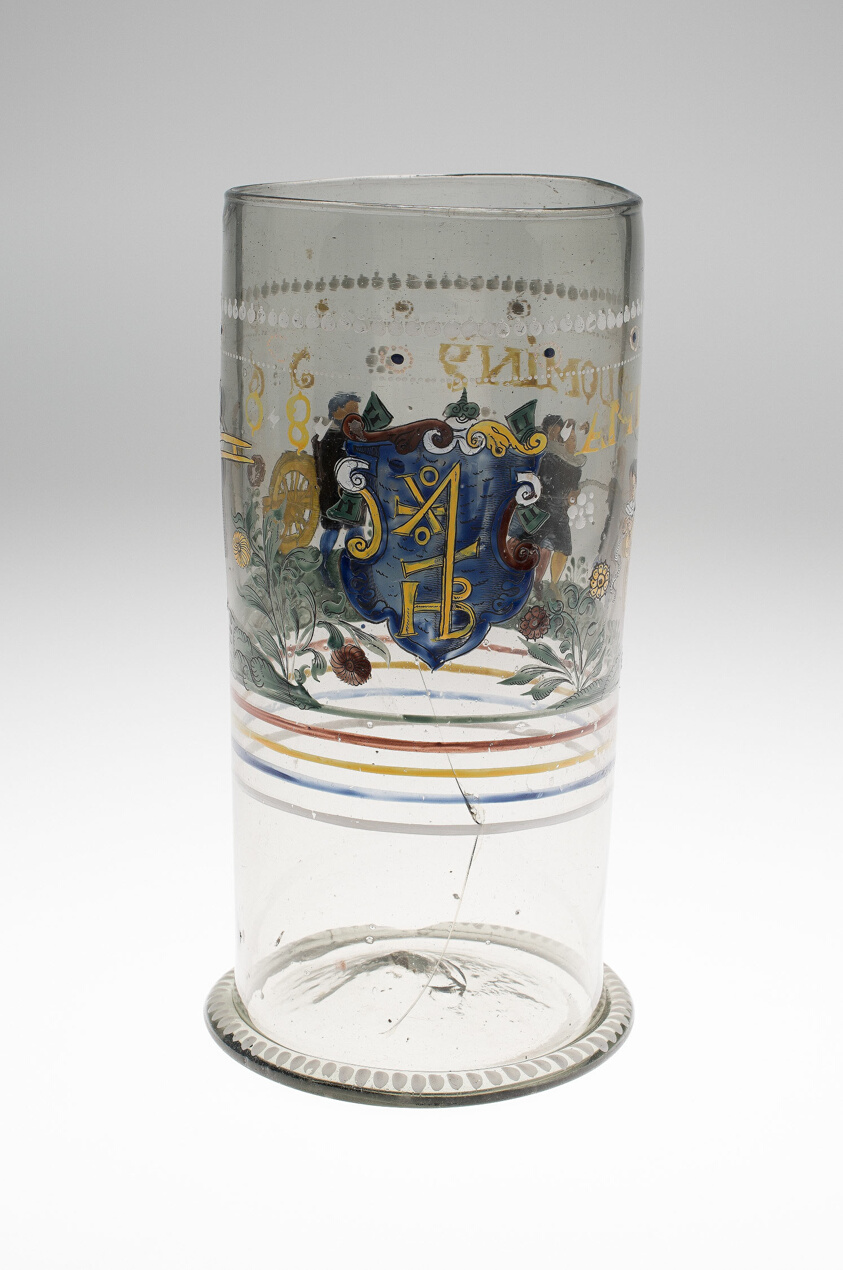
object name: Glass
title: Large Beaker (Humpen)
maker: Bohemia, Czech Republic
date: 1608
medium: Glass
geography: Bohemia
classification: drinking vessel; glass; european decorative arts